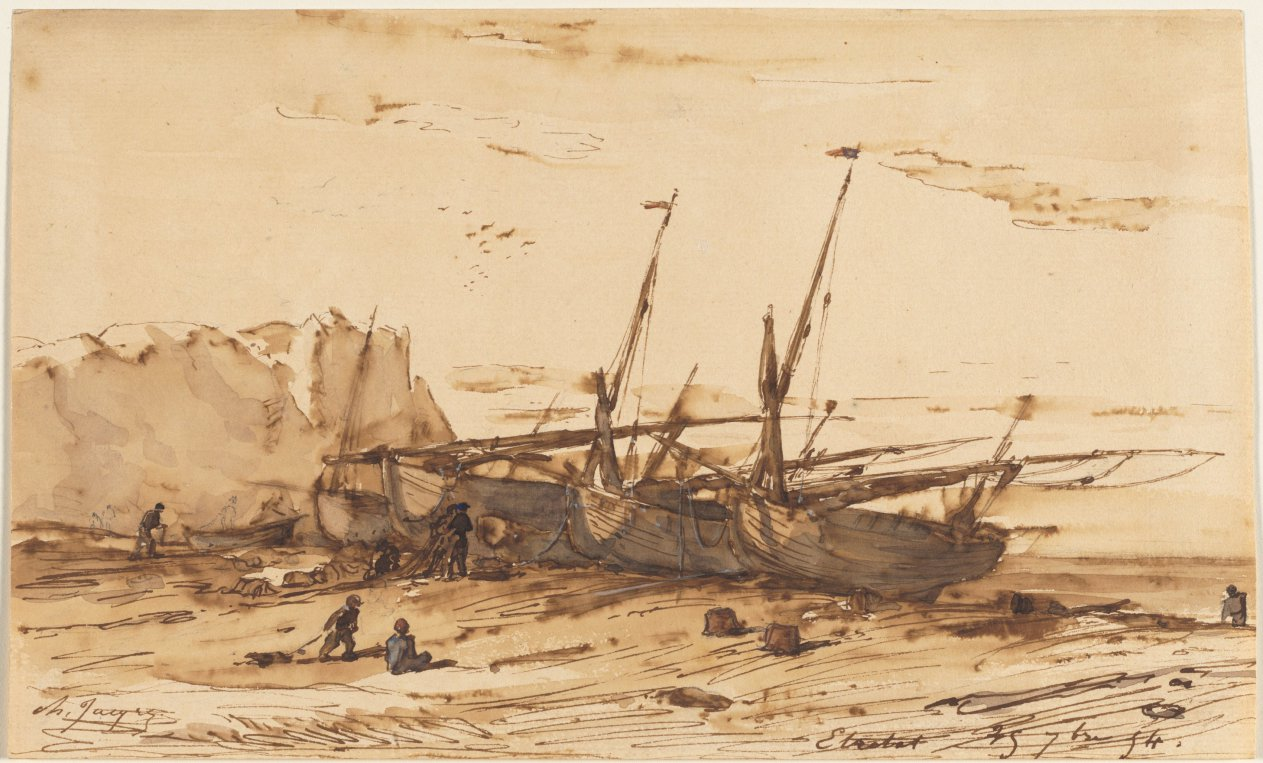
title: Étretat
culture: France, 19th century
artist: Charles-Émile Jacque (French, 1813–1894)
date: 1854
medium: brown ink, brown wash, graphite, touches of blue, red, and gray watercolor and gouache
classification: Drawing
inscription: Signed in brown ink, lower left: Ch. Jacque; inscribed in brown ink, lower right: Étretat 25 7bre 54